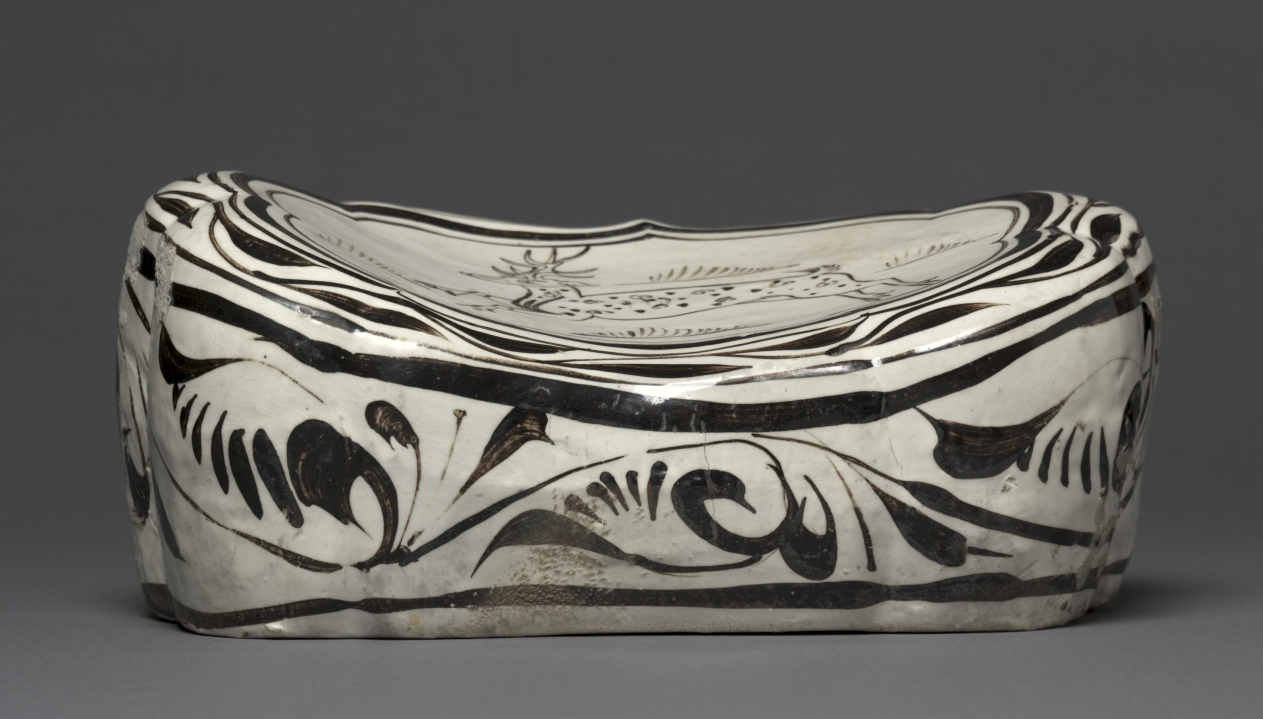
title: Pillow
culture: China, Song dynasty (960-1279) - Yuan dynasty (1271-1368)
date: 1100s–1200s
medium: Gray stoneware with underglaze painted decoration, Cizhou ware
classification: Ceramic